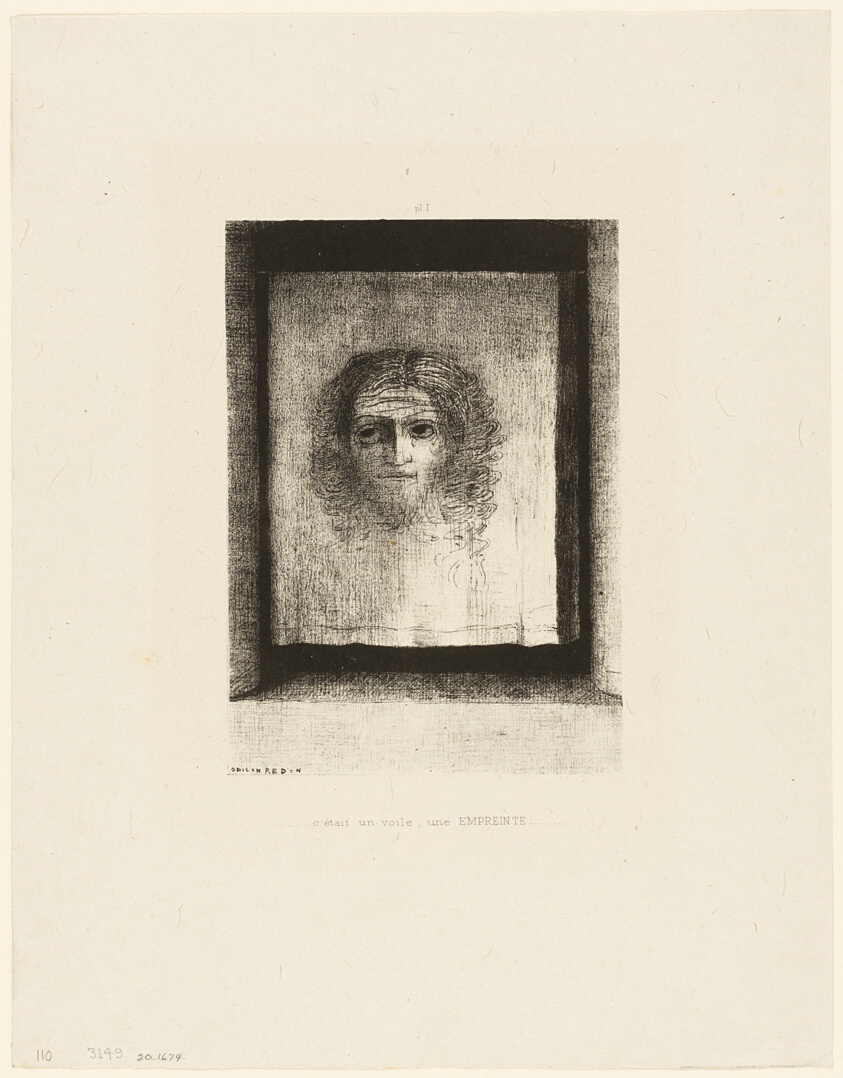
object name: Print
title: It was a Veil, an Imprint, plate 1 of 6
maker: Odilon Redon (French, 1840-1916)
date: 1891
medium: Lithograph in black on light gray chine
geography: France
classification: lithograph; print; prints and drawing; paper